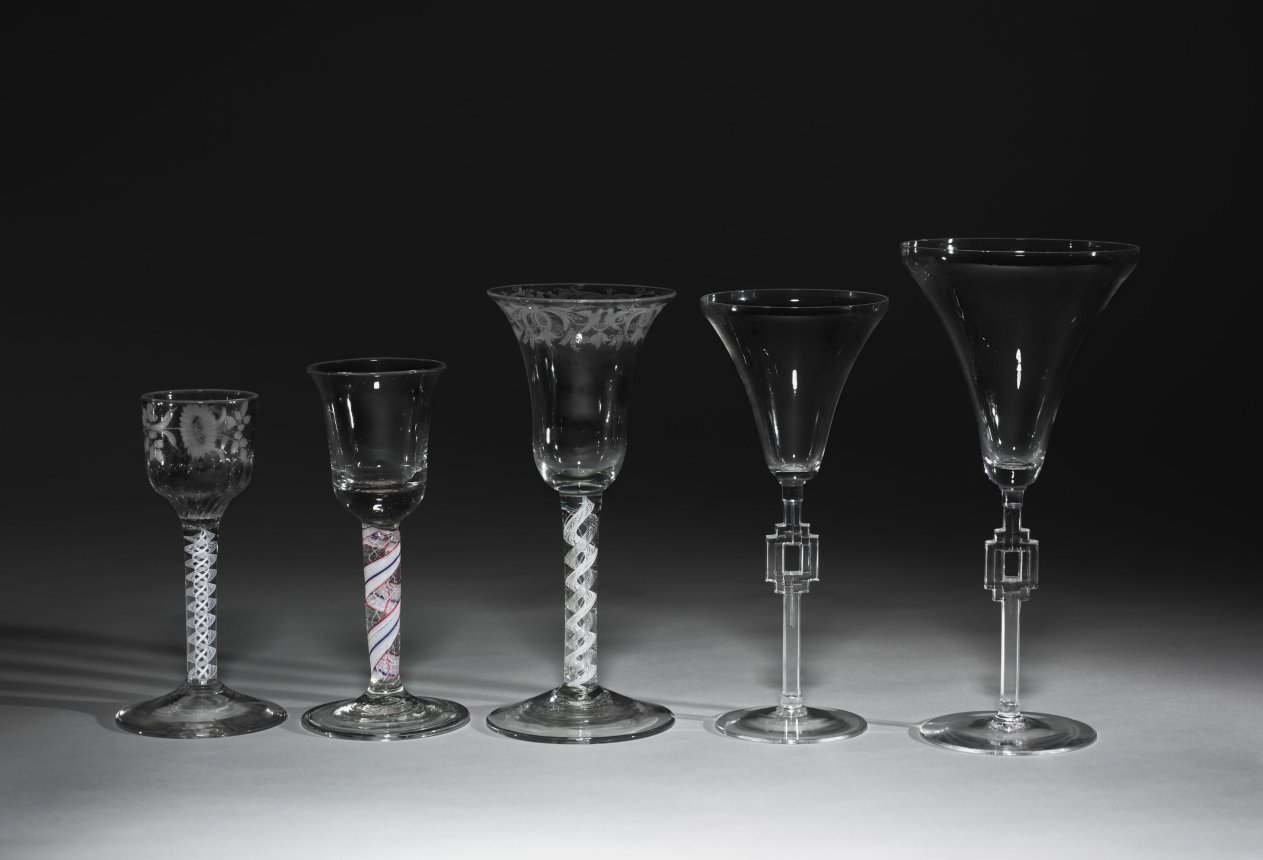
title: Goblet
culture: England, 18th century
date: c. 1725–1750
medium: glass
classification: Glass